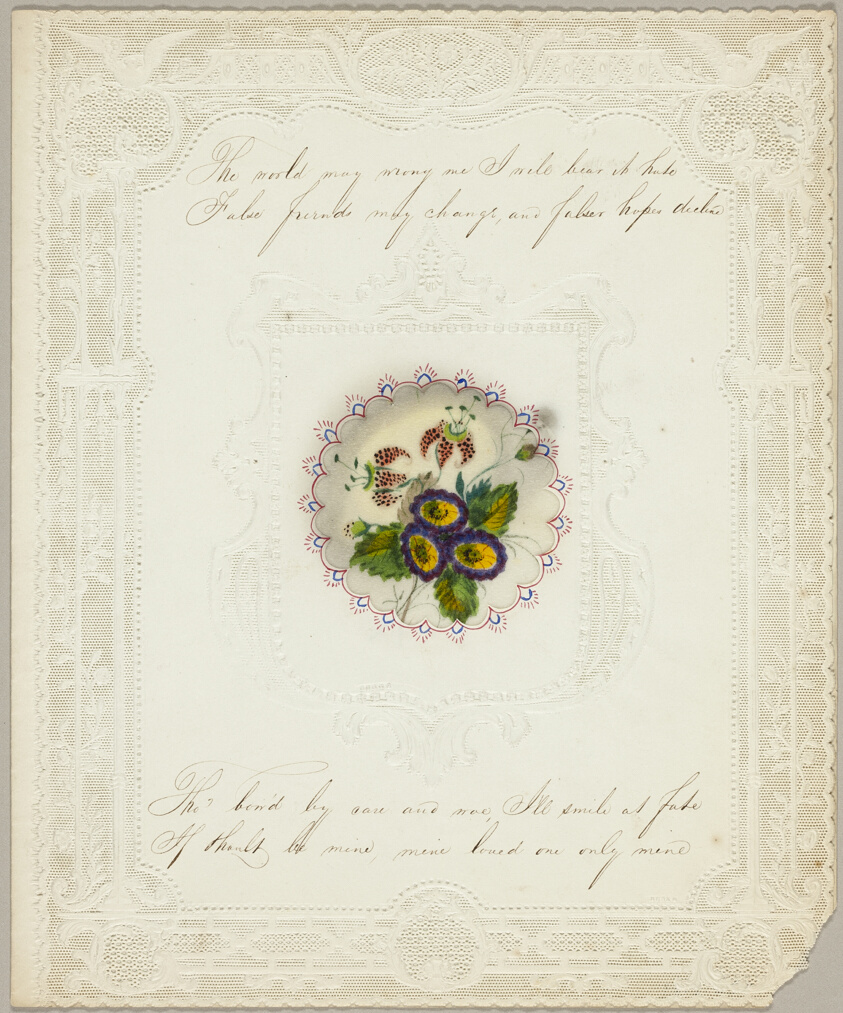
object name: Drawing and Watercolor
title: The World May Wrong Me (valentine)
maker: Unknown Artist; English, 19th century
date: 1840/50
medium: Watercolor and pen and brown ink, with collaged elements on cut and embossed ivory wove paper (lace)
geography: England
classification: valentine; prints and drawing; paper